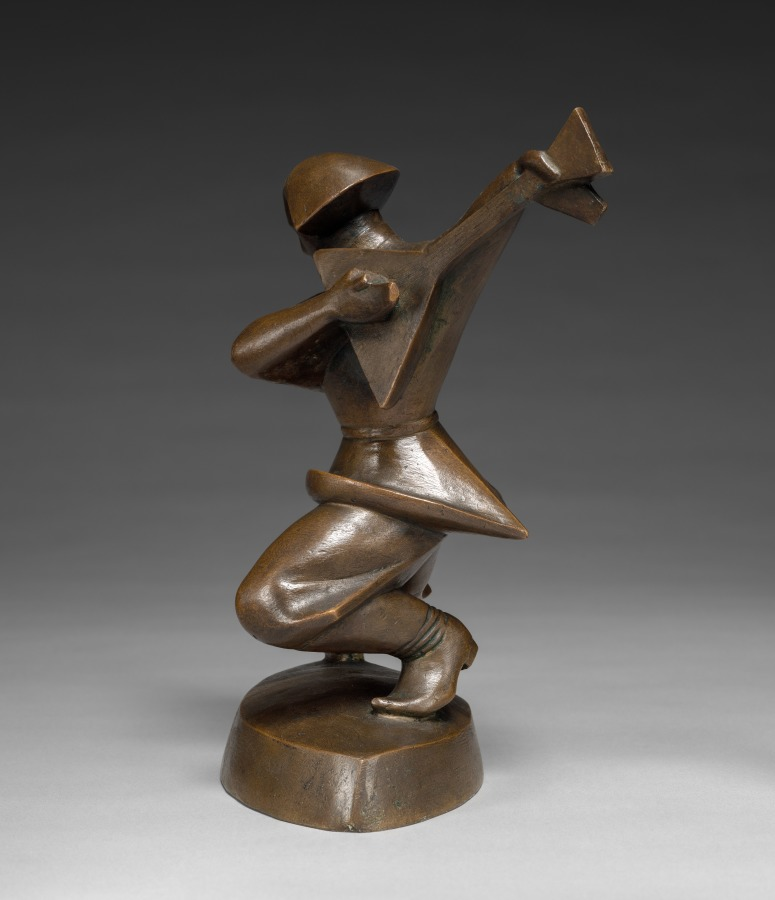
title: Balalaika Player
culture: America, Ohio, Cleveland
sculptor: Alexander Blazys (American, born Russian Empire [now Lithuania], 1894–1963)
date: 1925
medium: bronze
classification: Sculpture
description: A Lithuanian immigrant, Blazys introduced modernist sculpture to Cleveland upon his arrival in 1925. These figures merge rhythmic movement inspired by music with faceted, geometric planes derived from Cubism.